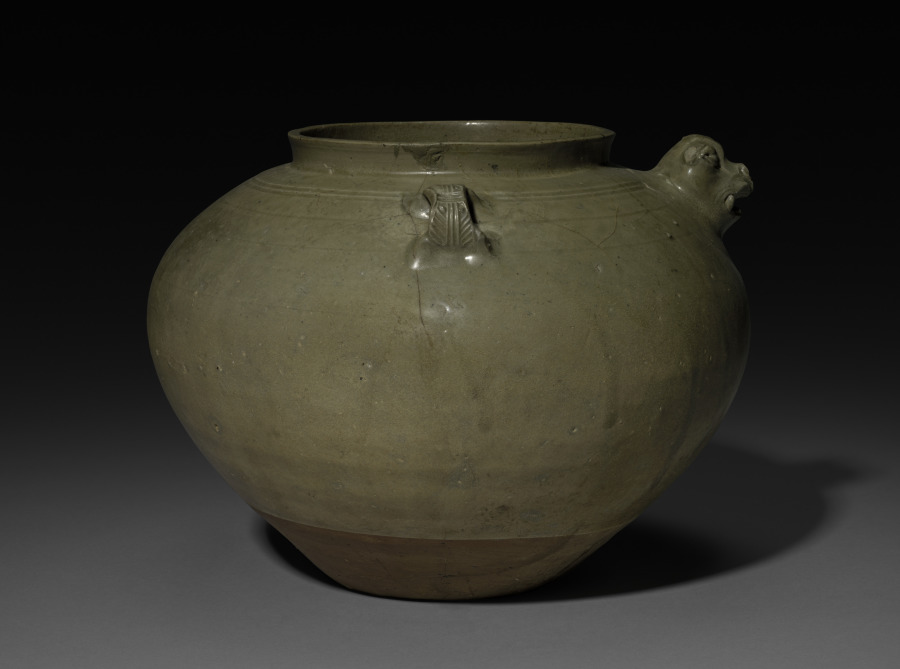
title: Jar with Tiger-Headed Spout: Yue Ware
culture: China, Western Jin dynasty (265-316 CE)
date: late 200s–late 300s CE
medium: glazed stoneware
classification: Ceramic